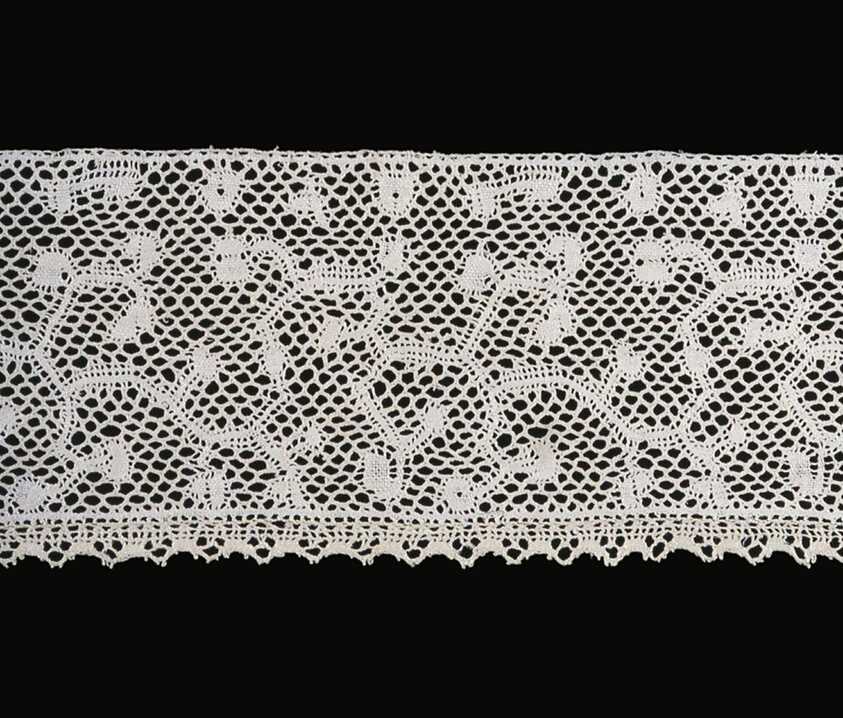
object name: Textile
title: Border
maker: Italy, probably Abruzzi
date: 1750/1800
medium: Linen, bobbin straight lace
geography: Italy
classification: textile; lace - bobbin